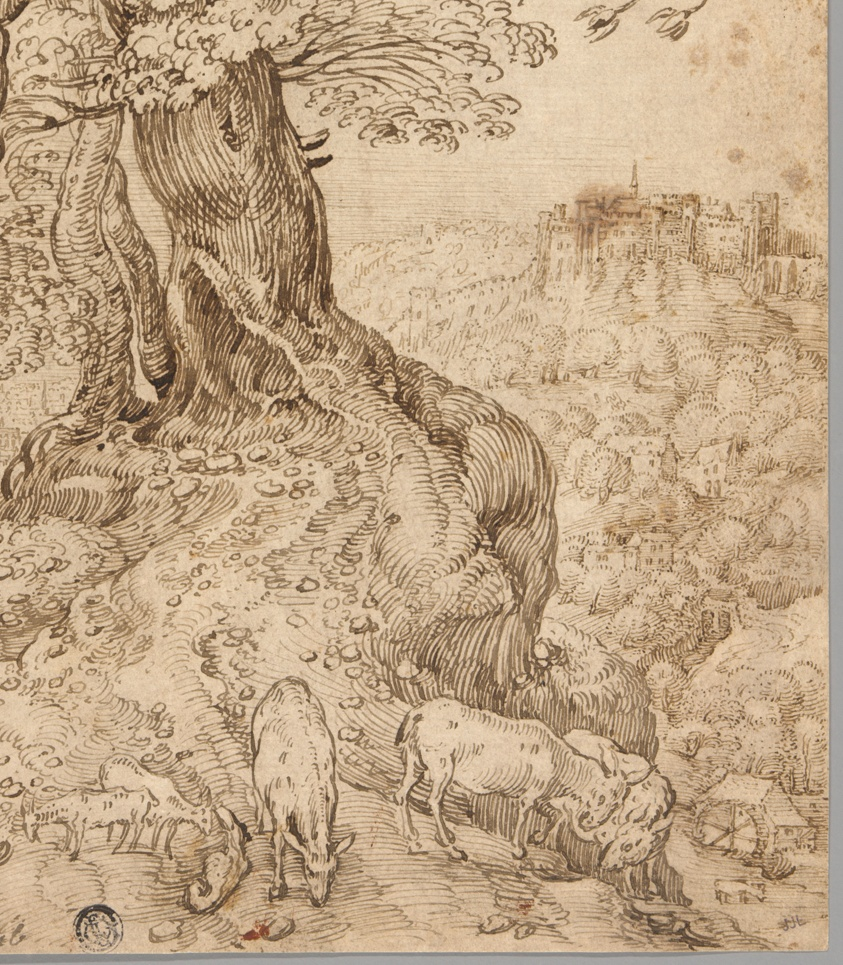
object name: Drawing and Watercolor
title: Wooded Landscape with Donkeys and Goats, and Castle on Hill in Distance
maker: After Pieter Bruegel, the elder; Flemish, 1525/30-1569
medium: Pen and brown ink on cream laid paper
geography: Flanders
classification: pen and ink drawings; drawings (visual works); prints and drawing